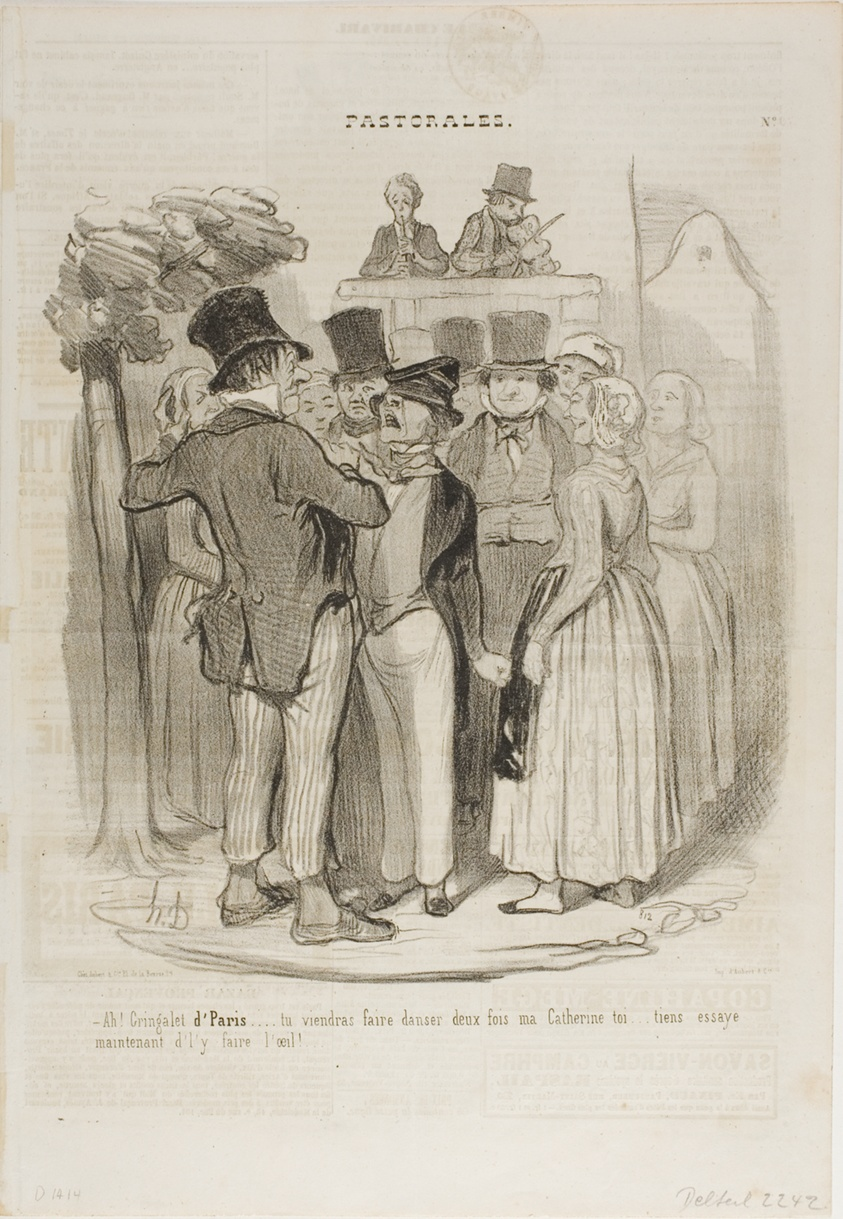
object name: Print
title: “- So, Gringalet from Paris!.... you will dance twice with my Catherine ...... try again now to make sheep's eyes at her,” plate 27 from Pastorales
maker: Honoré Victorin Daumier; French, 1808-1879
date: published October 28, 1845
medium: Lithograph in black, with scraping on stone on cream wove paper (sheet folded to form four pages), with text added in another hand and letterpress verso (and recto when unfolded)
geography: France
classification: lithograph; print; prints and drawing